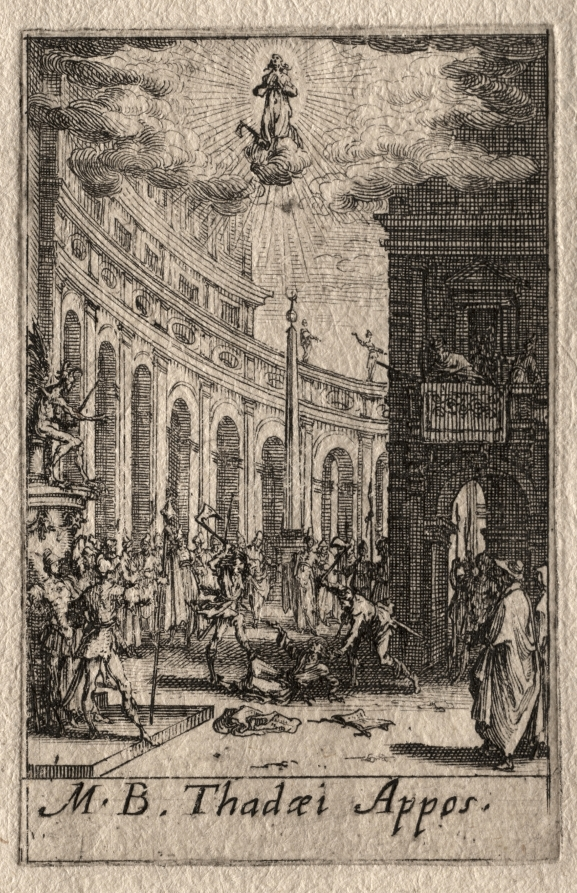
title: The Martyrdom of the Apostles: St. Thaddeus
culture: France, 17th century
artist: Jacques Callot (French, 1592–1635)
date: ca. 1632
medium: etching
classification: Print